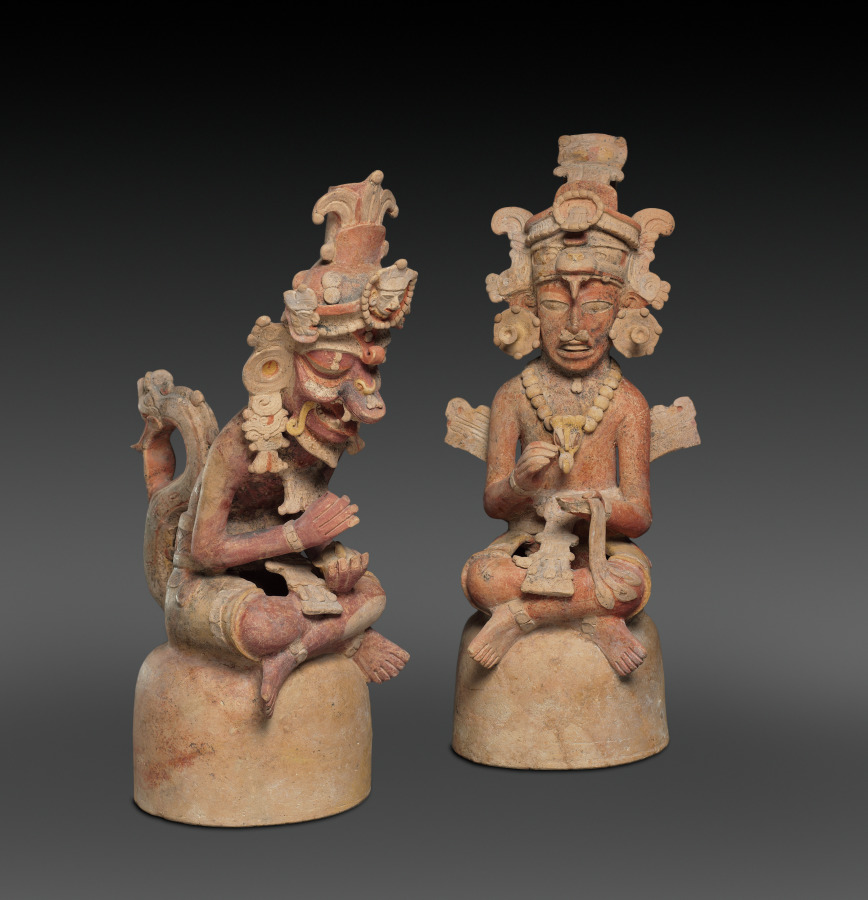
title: Two Artisans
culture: Guatemala, Petén region, Maya style (250-900), Maya style (250-900)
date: 250–600 CE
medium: earthenware with colored slips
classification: Sculpture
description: These figures represent the supernatural patrons of the visual arts and writing: the brothers Hun Batz and Hun Chuen ("One Monkey" and "One Artisan"). The two were refined artists but also bullies who tormented their younger brothers, who took revenge by transforming their elders into monkeys. Many Maya representations of the painter-scribes immortalize this fate by depicting the pair with both simian and human features, as here. The brothers are shown engaged in artistic or scribal pursuits. Sitting on high-domed bases that may have served as the lids of incense or offering bowls, each apparently once grasped a tool in his upper hand—for instance, a paint brush or a stylus for writing. In the lower hand, one cradles a small mask and the other, a piece of bark that likely refers to the beaten bark from which the Maya made books.